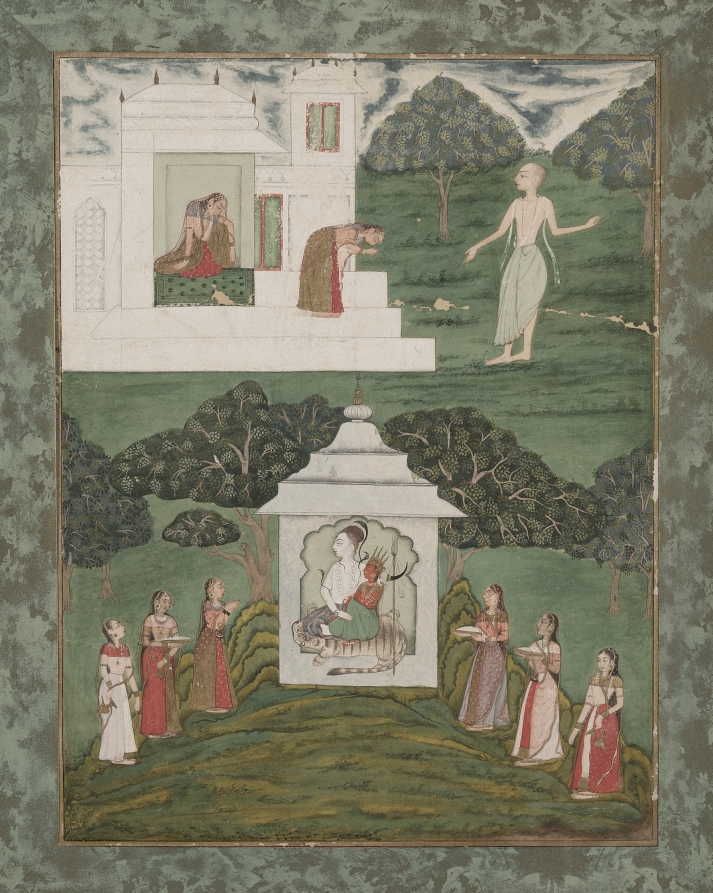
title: Worship of Shiva and Devi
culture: Northwestern India, Rajasthan, Rajput Kingdom of Bikaner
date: early 1700s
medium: Gum tempera, ink, and gold on paper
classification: Painting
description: In the shrine in the lower half of the painting, the Hindu god Shiva appears in human form along with his wife, depicted as a red goddess. Shiva has the appearance of a yogi, his matted locs coiled on top of his head, a chain of skulls around his neck. He wears cobras as jewelry, and his body is white with ashes of the cremated dead. The crescent moon perches at his third eye of knowledge. Six women bear offerings in vessels of brass—a pure material suitable for sacred food and drink. The narrative scene featuring a heroine at three moments of time remains unidentified.